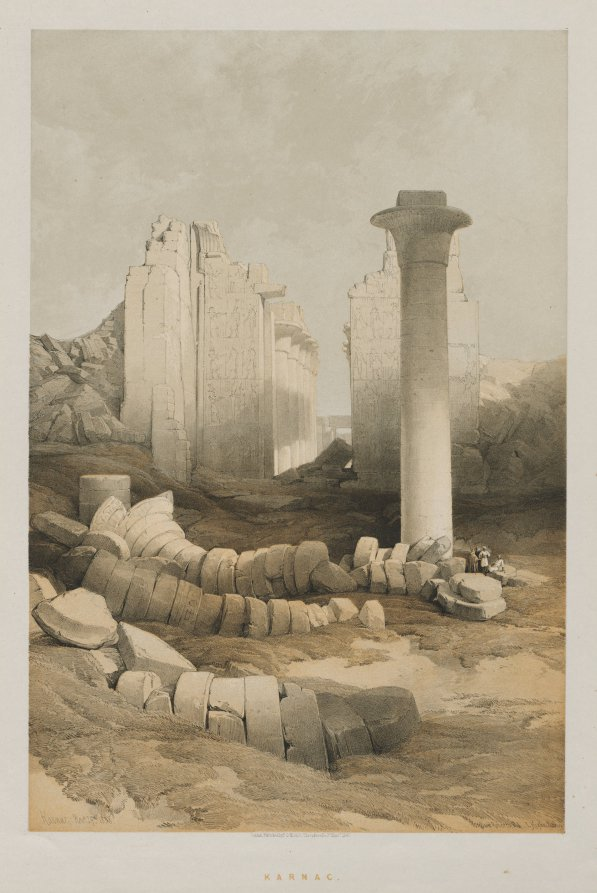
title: Egypt and Nubia, Volume II: Karnak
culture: England, 19th century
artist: Louis Haghe (British, 1806–1885)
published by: F. G. Moon, 20 Threadneedle Street, London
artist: after David Roberts (Scottish, 1796–1864)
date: 1848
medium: color lithograph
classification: Print